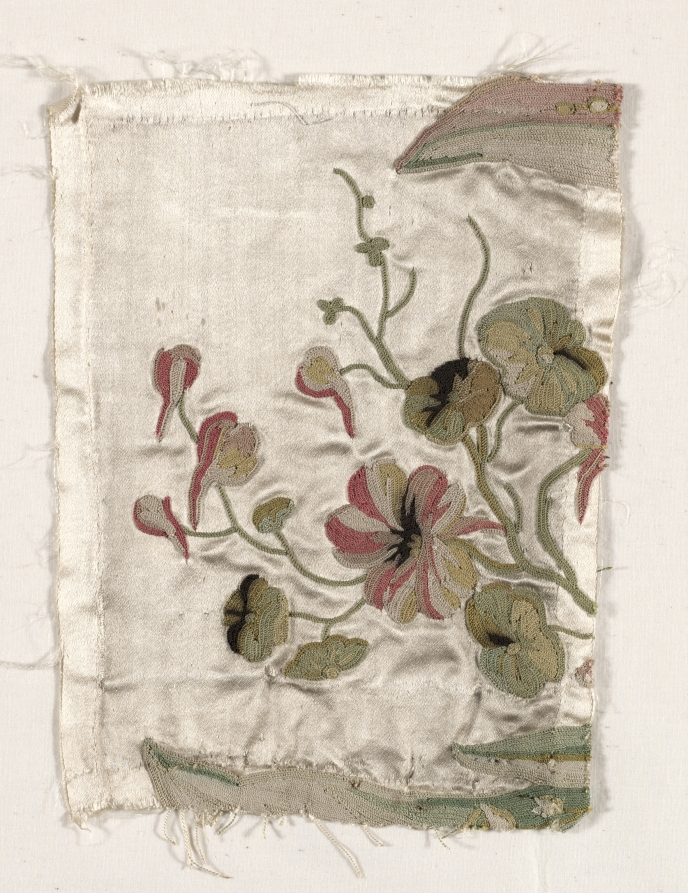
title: Coverlet Fragment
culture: France, 18th Century, period of Louis XVI (1774-1793)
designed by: Philippe de Lasalle (French, 1723–1805)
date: c. 1760–1770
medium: embroidered satin and silk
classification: Textile